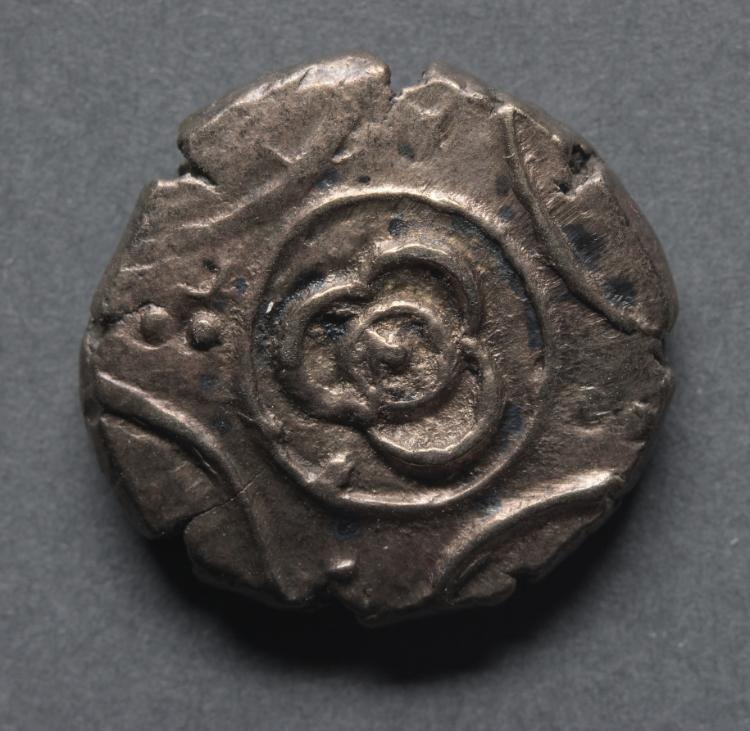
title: Stater: Three-Petal Flower (obverse)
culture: England, Iceni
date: 20 BCE–10 CE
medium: gold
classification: Coins